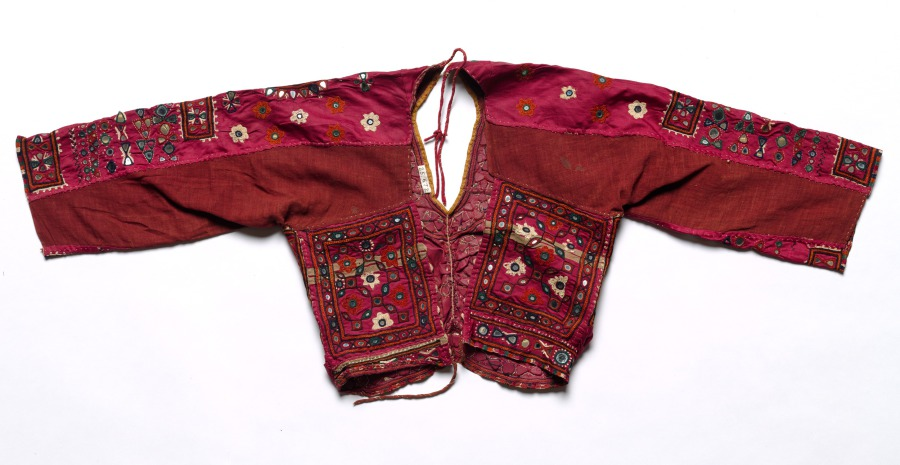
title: Bodice or Choli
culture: Western India, Gujarat, Kachchh or Pakistan, Sindh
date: 1800s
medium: silk on silk satin with mirror-glass inserts, embroidery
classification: Embroidery